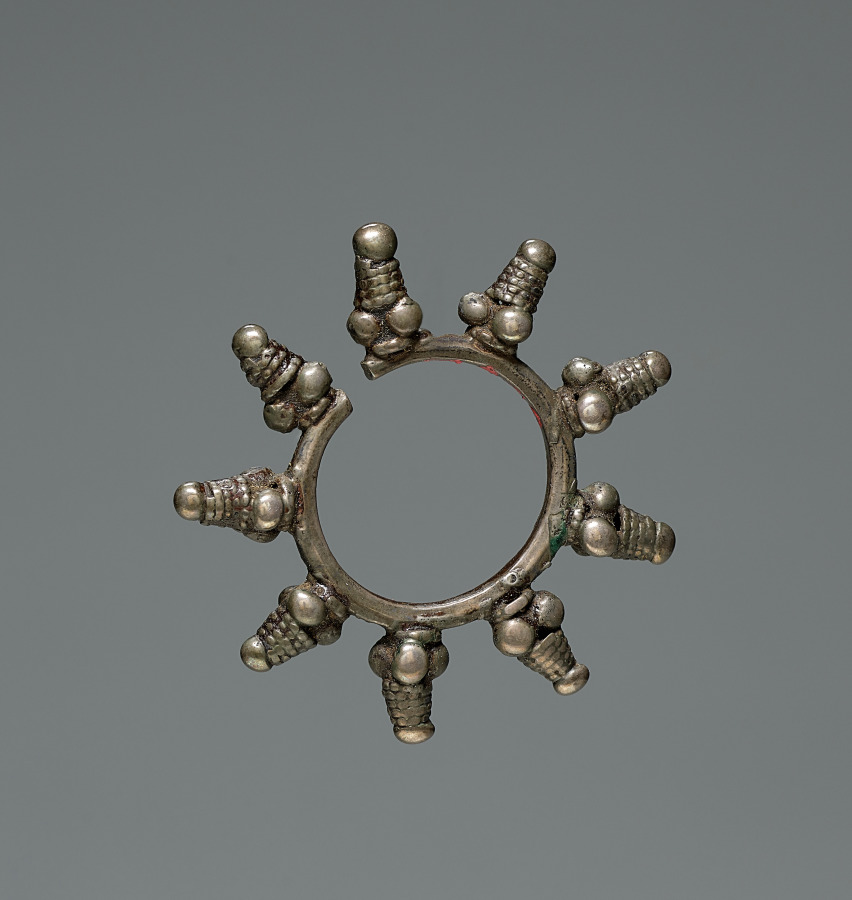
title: Earring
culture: India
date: 1800s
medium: silver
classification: Jewelry